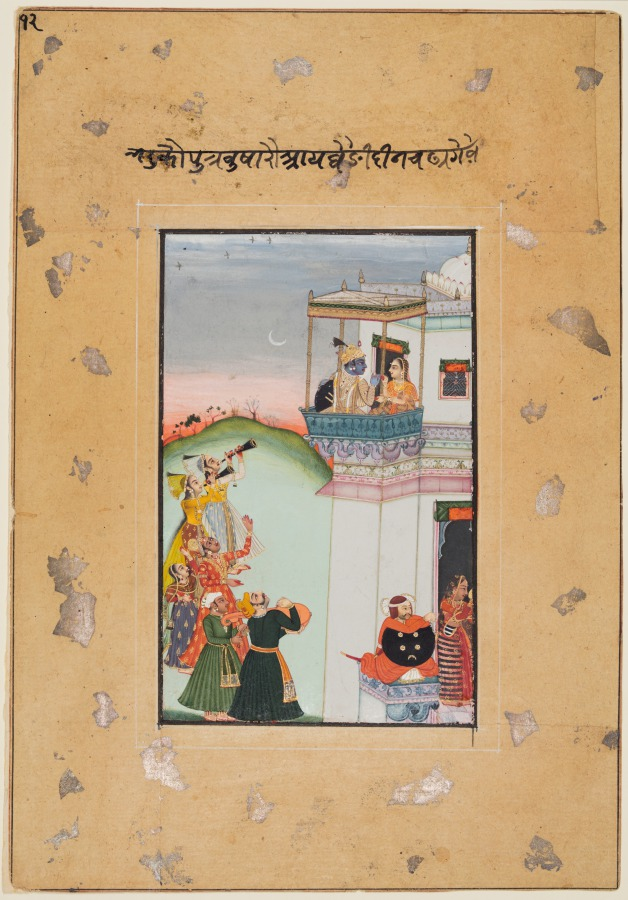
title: Krishna and Consort on a Palace Balcony with Musicians: Vukharo Ragaputra of Bhairav, from the “Boston Ragamala”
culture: Northwestern India, Rajasthan, Rajput Kingdom of Kota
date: 1770–75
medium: gum tempera, ink, silver, and gold on paper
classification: Painting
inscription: 12. bharu kau putra bukhārau ādha gaiṛī dīna caḍhā geve'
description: The mood of this scene is joyous, as the blue-skinned god Krishna sits with his beloved in a high covered balcony. Below, exuberant musicians blow horns and clap time. One man in front plays the cymbals next to the open-mouthed singer on a lute-like instrument. A guard sits relaxed and unworried, counting the beads of his rosary.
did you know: This musical mode is performed at early morning, suggested by the sunrise at the horizon.